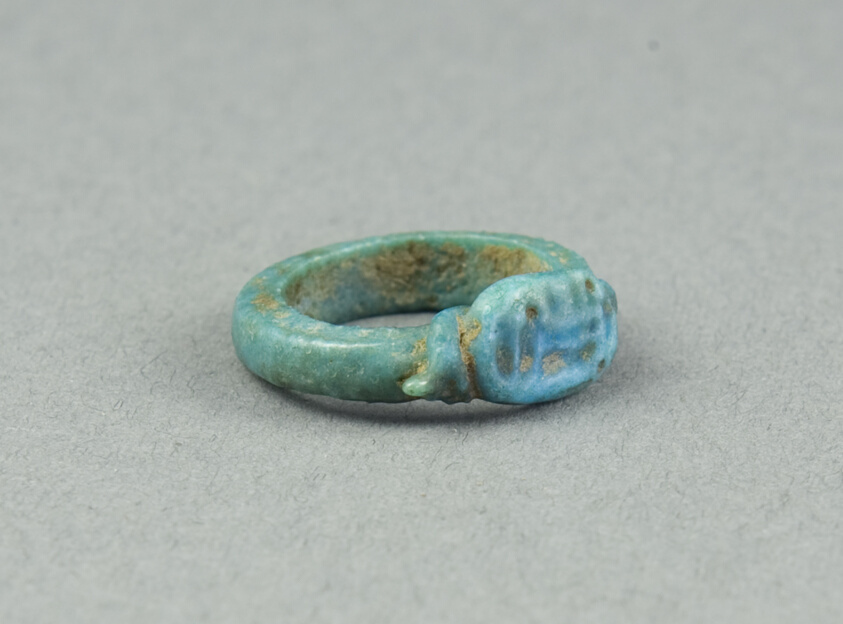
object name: Costume and Accessories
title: Ring: Amun-Ra, flanked by nb signs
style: egyptian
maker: Egyptian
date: New Kingdom, Dynasty 18 (about 1390 BCE)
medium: Faience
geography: Egypt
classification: ring (jewelry); ceramics; jewelry; ancient art; costume; faïence (composite material)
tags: gods (deities)